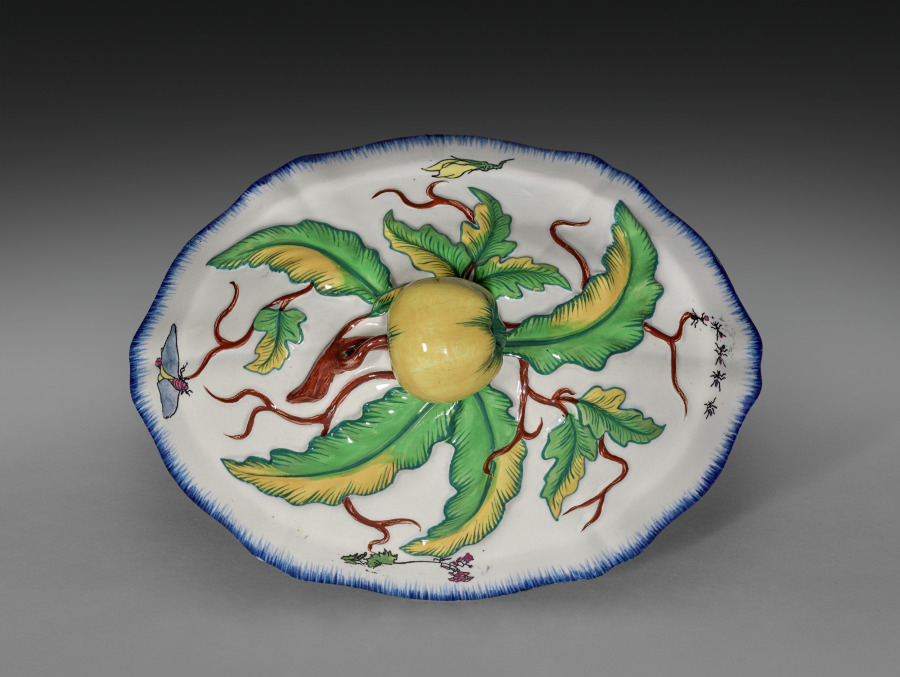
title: Cover for a Tureen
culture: France, Creil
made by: Creil Factory (French)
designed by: Félix Bracquemond (French, 1833–1914)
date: 1866–75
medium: porcelain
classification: Ceramic